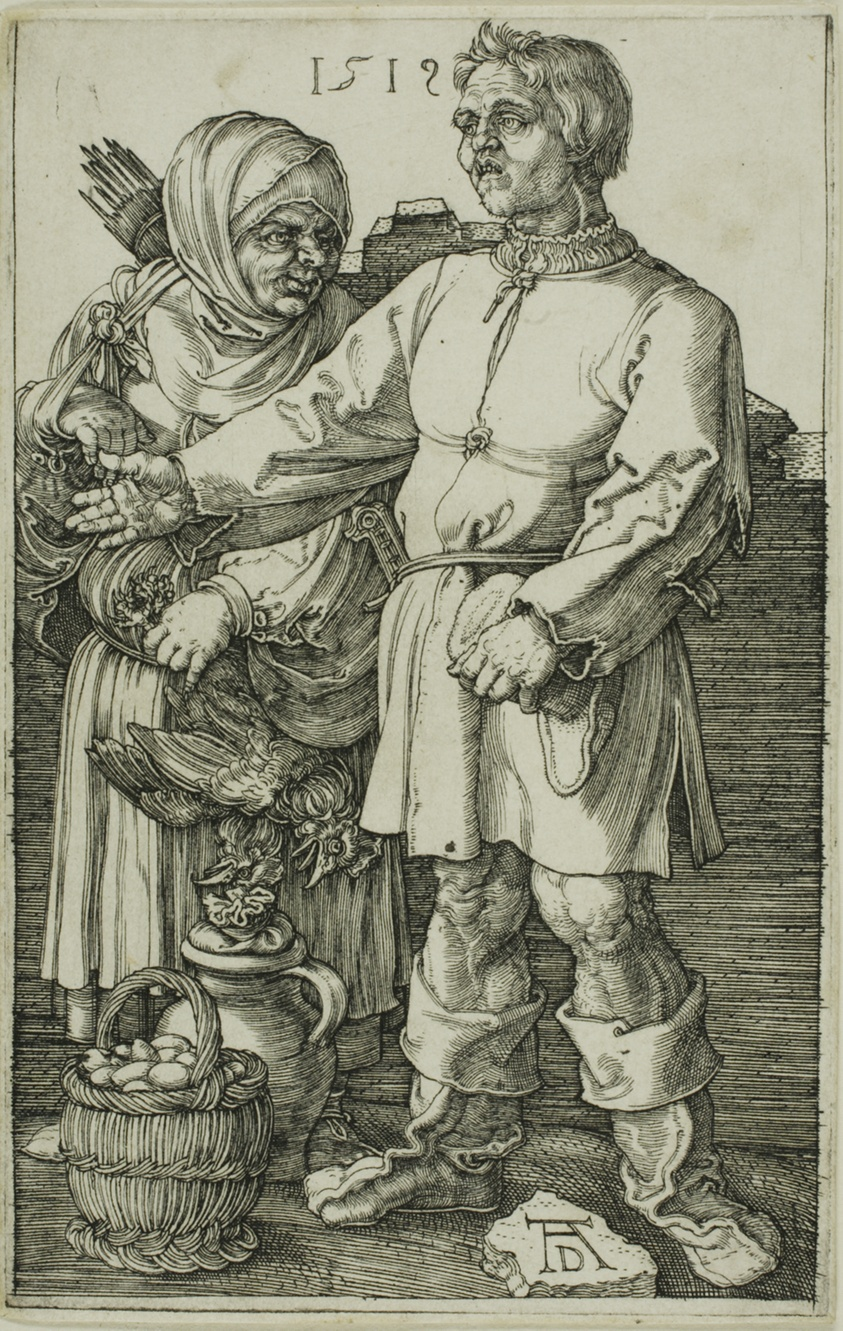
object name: Print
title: The Peasant and His Wife at Market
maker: Albrecht Dürer (German, 1471-1528)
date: 1519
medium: Engraving in black on off-white laid paper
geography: Germany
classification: engraving; print; prints and drawing; paper